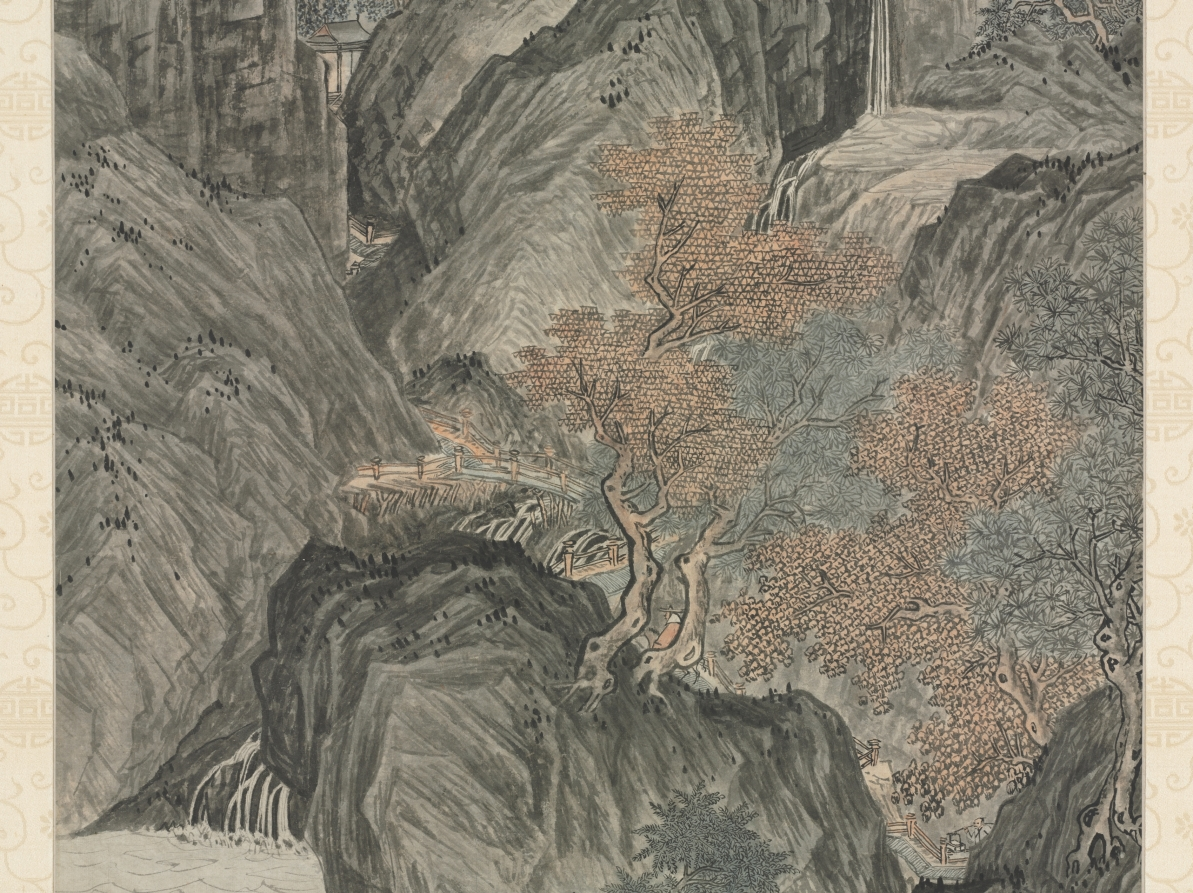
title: Mount Hua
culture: China, Ming dynasty (1368–1644)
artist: Tang Yin (Chinese, 1470–1523)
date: 1506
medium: hanging scroll; ink and light color on paper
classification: Painting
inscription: Artist's inscription, signature, and 4 seals: Wearing a white-bordered scholar's robe and green jade pendants, His life is unconcerned with worldly fame. Like P'an Lang resisting old age through high spirits, Crazy and clumsy he rides his donkey past Mount Hua. T'ang Yin painted this and composed the poem, the first month of the year of the Cheng-te era [1506]. [2 seals] T'ang Tzu-wei yin; T'ang. [2 seals, lower left corner] Po-hu T'ang Yin ssu yin; T'ang Chü-shih. trans. LYSL 12 additional seals: 2 of Wang Shan (1645-1728); 5 of Liu Shu (1759-1816); 1 of Yeh Ao (19th c.); 1 label and 2 seals of Lu Hui (1851-1920); 2 seals unidentified.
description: In this work, Tang Yin accumulates towering mountain summits in the manner of the Sung master, Li Tang, to capture the monumental presence of his subject. Tang Yin’s angular brushstrokes and ink washes of varied intensity give texture to the rocky surface and accent the play of light. Mount Hua is situated in southern Shaanxi province in North China. Hardly accessible during Tang Yin’s time, the mountains were frequented by immortality seekers to dwell or collect herbal drugs there. Tang Yin's potentially brilliant career was shattered in 1499 after he went to the capital to take the jinshi examination. He got entangled in a bribery case that caused him to spend seven years in prison. After his release, Tang returned to Suzhou, and settled on a career as a professional painter. One of Tang's few dated works, Mount Hua was painted seven years after this incident.